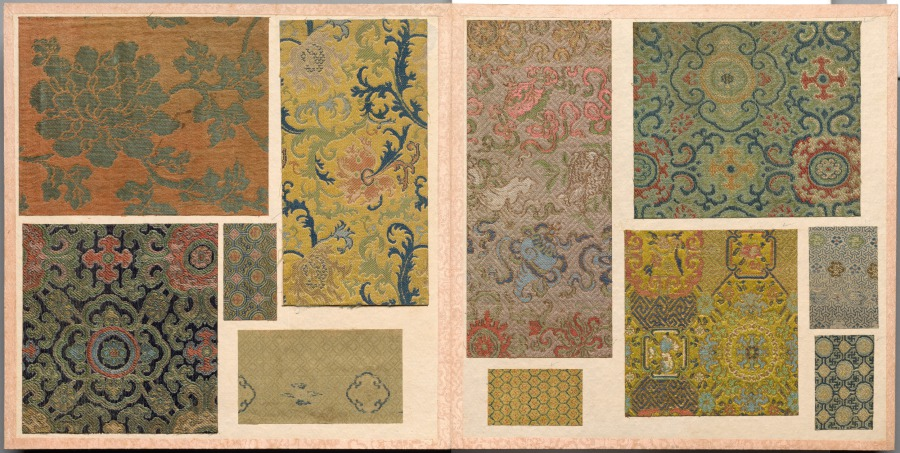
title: Album of Textile Samples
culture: Japan and China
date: 1700s–1800s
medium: silk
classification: Textile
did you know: This album contains 46 pages with 156 mounted Chinese or Japanese textile samples.